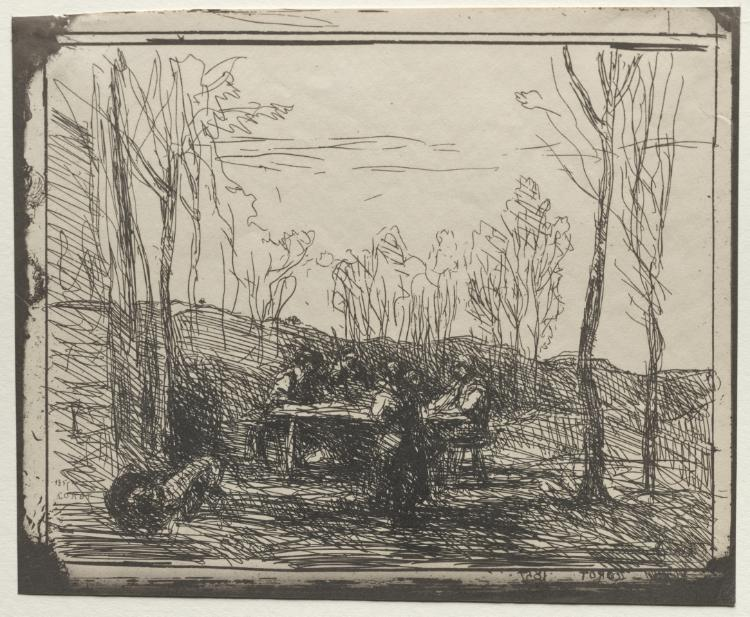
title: Breakfast in a Glade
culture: France, 19th century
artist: Jean Baptiste Camille Corot (French, 1796–1875)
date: original impression 1857, printed in 1921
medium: cliché-verre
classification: Print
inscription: signed and dated, lower left: "COROT 1857" on the glass plate and signed and dated, lower right: "COROT 1857" on the glass plate